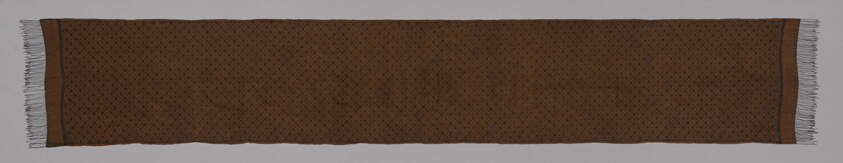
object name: Costume and Accessories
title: Selendang (Shawl)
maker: Indonesia, Java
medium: Finely woven silk dyed cinnamon brown; all-over design in black made by batik process in diagonal pattern of squares and rectangles enclosing diamond and formalized flower patterns; border consists of hear or leaf shaped band above straight lines running to twisted fringe dyed black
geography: Java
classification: textile; costume; weaving; dress (garment); clothing